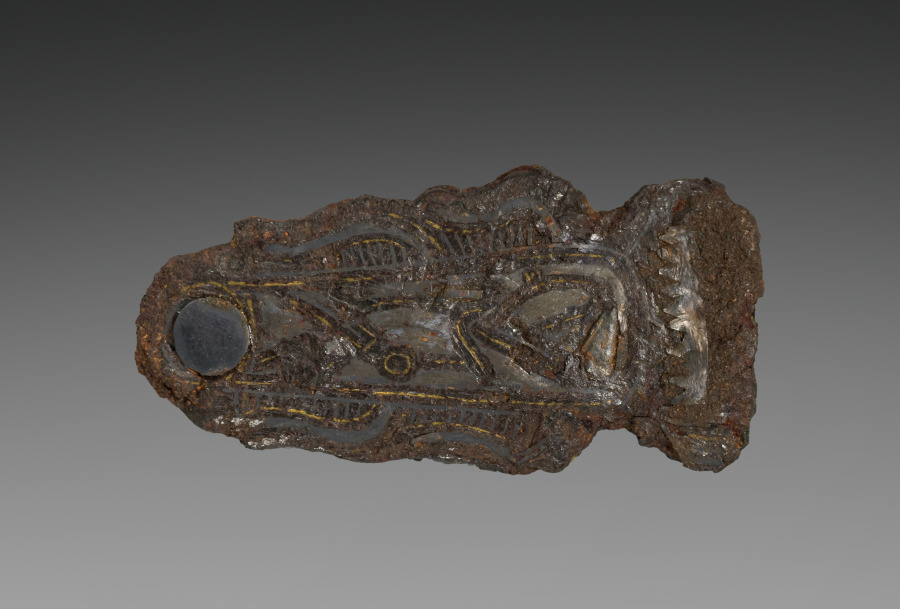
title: Buckle (clasp)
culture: Merovingian, Burgundian, Migration period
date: 600s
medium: iron with silver overlay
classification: Jewelry